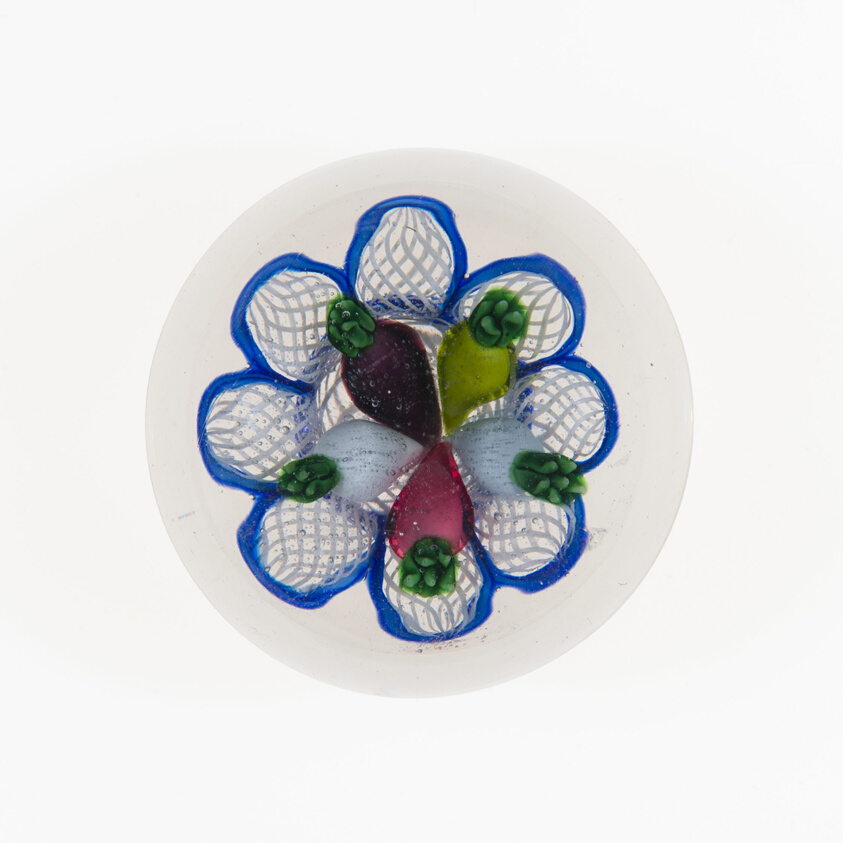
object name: Glass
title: Paperweight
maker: Saint-Louis Glassworks (Cristalleries de Saint-Louis); Lorraine, France, founded 1586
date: c. 1845–60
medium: Glass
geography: Saint-Louis-lès-Bitche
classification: paperweight; glass